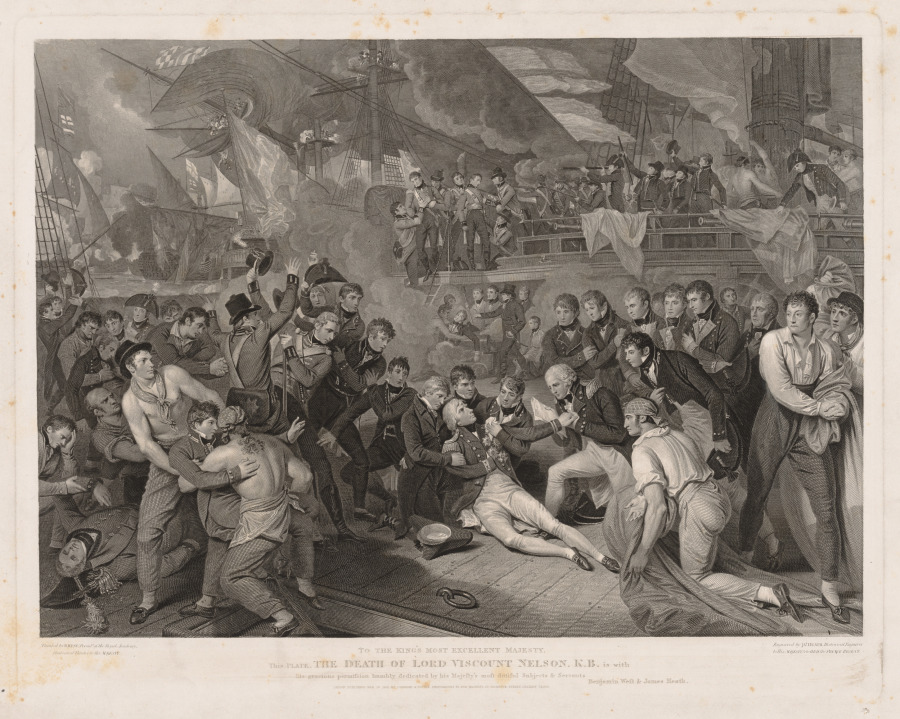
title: Death of Lord Nelson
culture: England, 19th century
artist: James Heath (British, 1757–1834)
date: 1841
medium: engraving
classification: Print